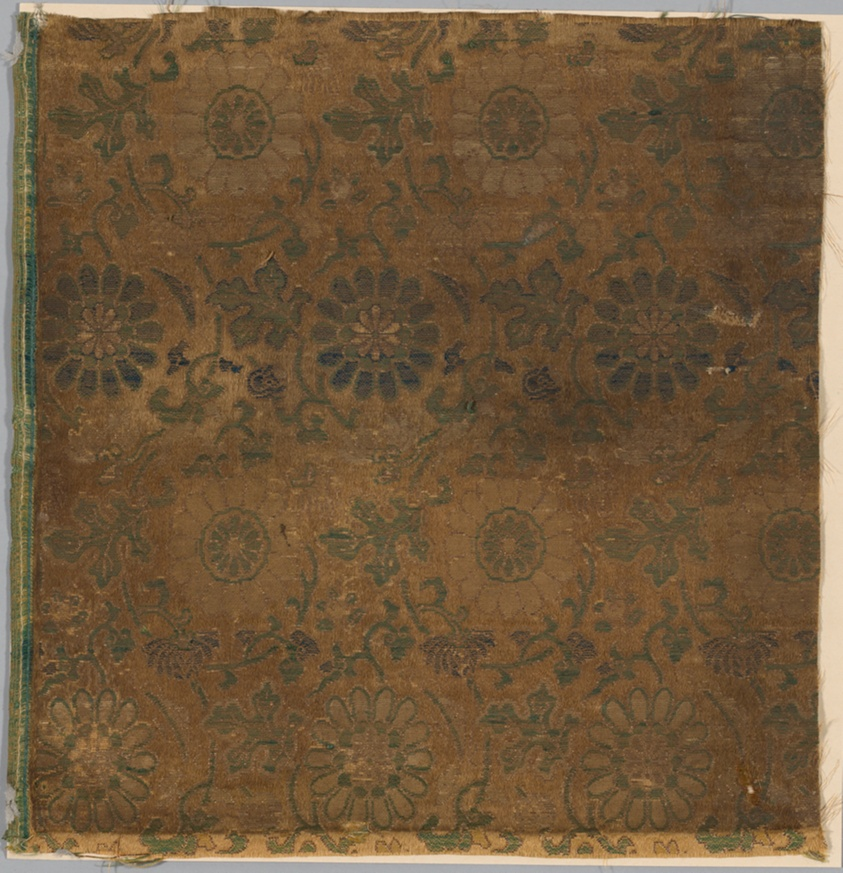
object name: Textile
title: Fragment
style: edo (japanese period)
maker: Japan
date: Edo period (1615–1868), 1675/1800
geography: Japan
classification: textile; weaving